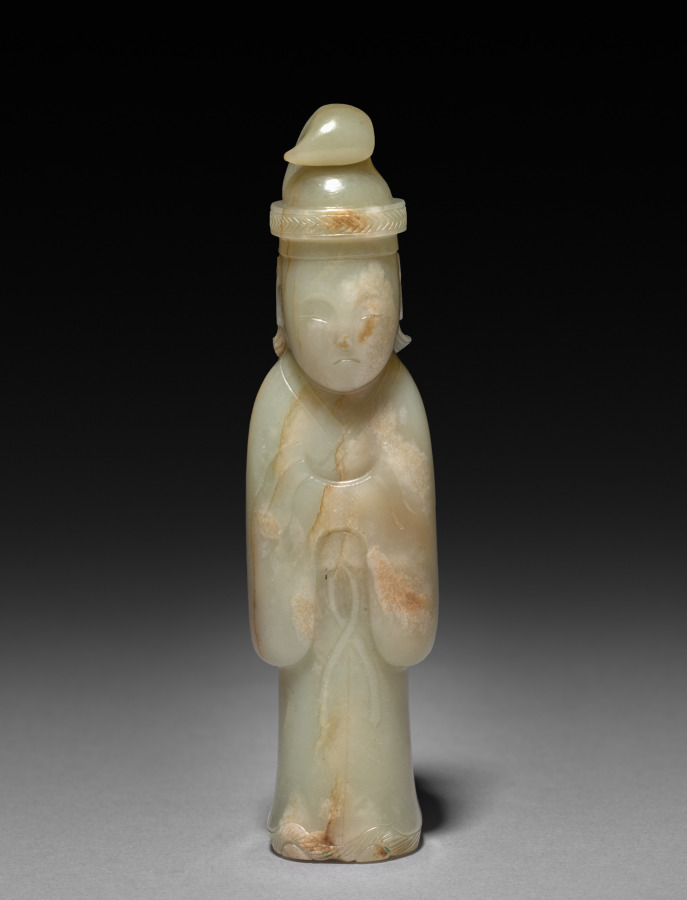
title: Standing Figure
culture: China, Qing dynasty (1644-1911)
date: 1644–1911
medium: jade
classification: Jade